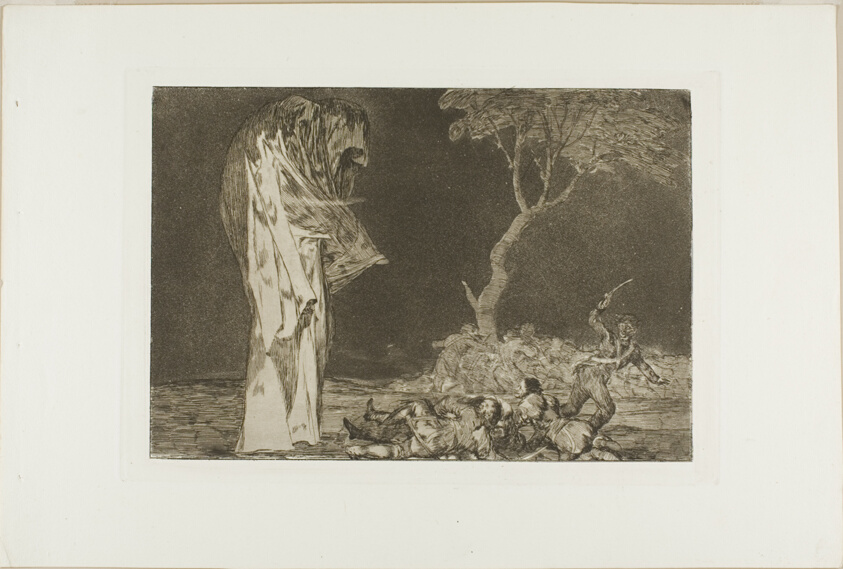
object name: Print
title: Soldiers Frightened by a Phantom, from Disparates, published as plate 2 in Los Proverbios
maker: Francisco José de Goya y Lucientes (Spanish, 1746-1828)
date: 1816–19, published 1864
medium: Etching and burnished aquatint in brown-black on ivory wove paper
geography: Spain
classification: etching; print; prints and drawing